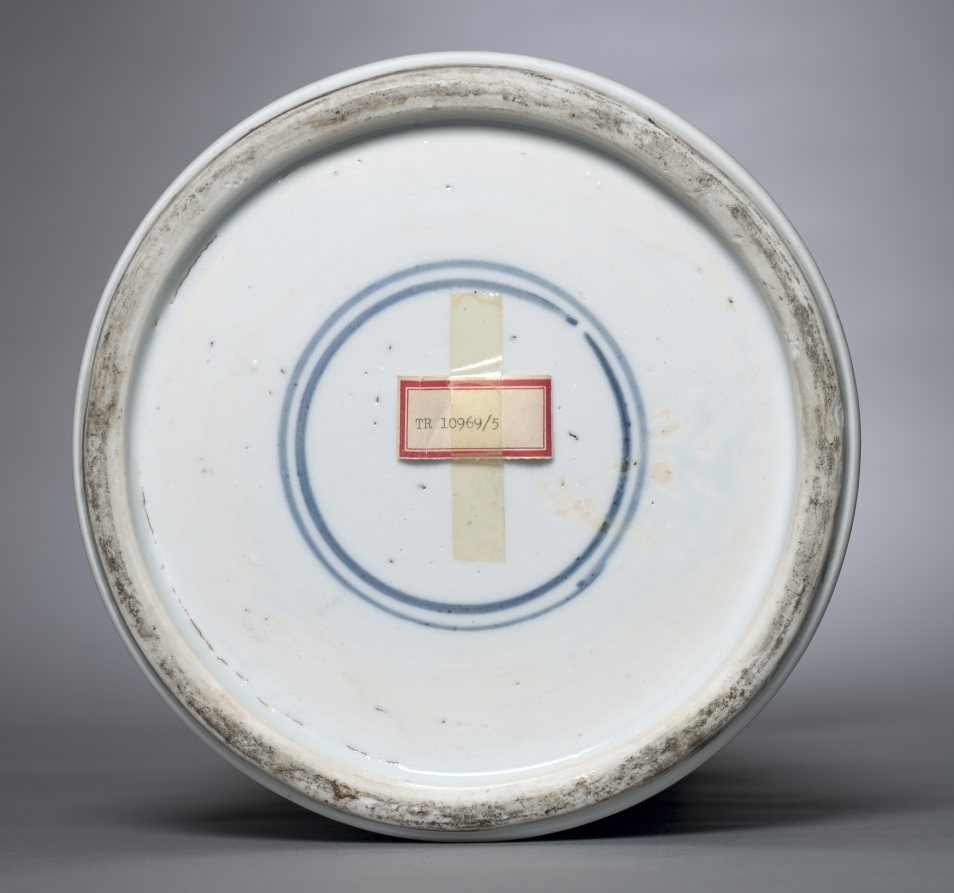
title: Vase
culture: China, Jiangxi province, Jingdezhen kilns, Qing dynasty (1644–1911), Kangxi reign (1662–1722)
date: 1662–1722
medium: porcelain with underglaze blue decoration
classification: Ceramic